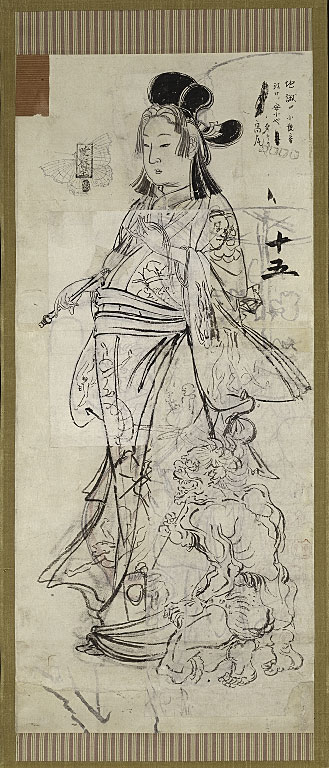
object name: Painting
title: Bijin (Beauty), one of six sketches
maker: Kawanabe Kyosai; Japanese, 1831-1889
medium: Hanging scroll; ink on paper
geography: Japan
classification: hanging scroll; painting; asian art